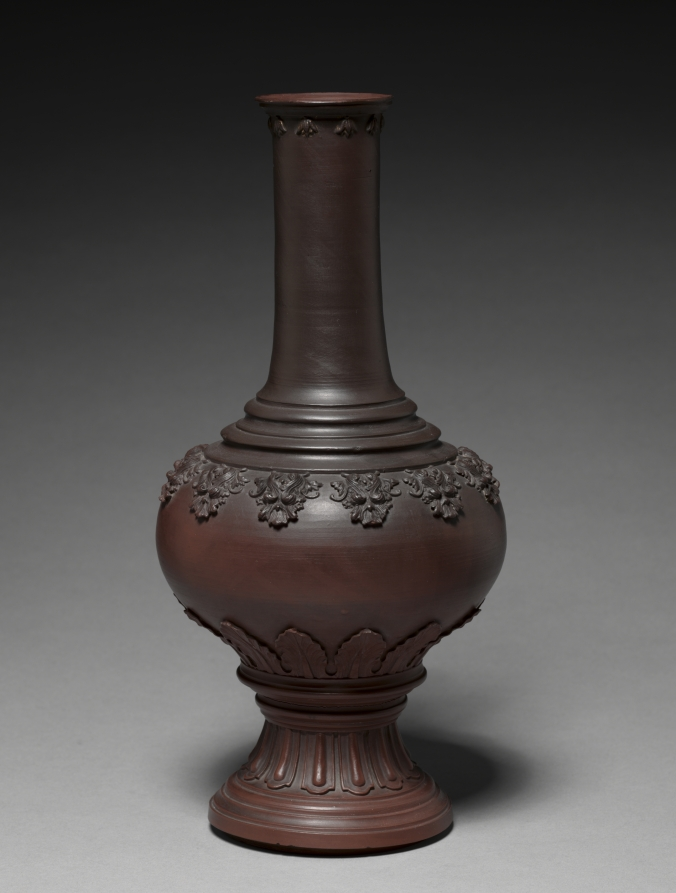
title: Vase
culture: Germany, Meissen, 18th century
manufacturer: Meissen Porcelain Factory (German, est. c. 1710)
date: c. 1710–1715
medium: red stoneware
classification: Ceramic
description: Because of firing difficulties, early Meissen red stoneware is often inconsistent in color. That is true of this piece, the neck of which is darker than the body. Faint traces of gilding remain on the neck, indicating that originally the change in color was disguised by an overlay of gilded ornament.